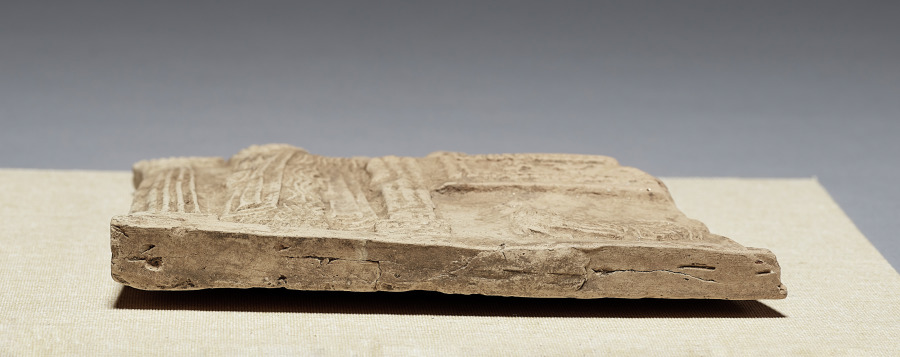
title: Votive Plaque (Pinax) with Persephone Making her Bridal Bed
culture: West Greek/South Italian, Classical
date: c. 490–450 BCE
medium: Terracotta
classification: Plaque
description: Probably once brightly painted, this relief plaque belongs to a series of votive dedications made in Locri Epizephirii, near the “toe” of Italy, to the goddess Persephone (or Kore), daughter of Demeter. Following her abduction by Hades, god of the Underworld, Persephone regularly returned to earth, dictating the seasons and making agriculture possible. Often, as here, the plaques show domestic scenes.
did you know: The rooster often appears with Persephone on such plaques, perhaps because both mark transitions.